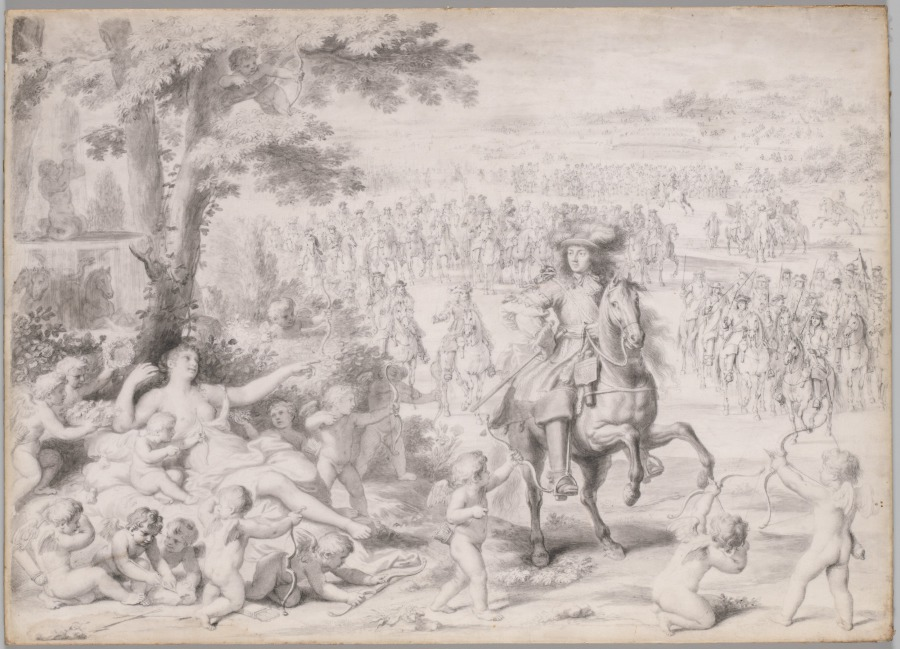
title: Louis XIV Captured by Venus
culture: France, 17th century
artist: studio of Charles Le Brun (French, 1619–1690)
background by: Adam Frans van der Meulen (Flemish, 1632–1690)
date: early 1670s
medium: black chalk, graphite, and brush and gray wash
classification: Drawing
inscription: VERSO, ON WOOD PANEL, upper left, in brown ink [on sticker]: Louis XIV / & / Duc[illegible] Montespan / by / Le Brun & / Van der Meulen ; [on same sticker] in graphite: [809?] ; center, in brown ink [on Schillersdorfer Schloss-Inventar sticker]: 47 ; upper left, in black paint: K6505 [sideways] ; upper left, in red crayon: AR 733 ; center right, in blue crayon: AR 733 ; lower center, in blue crayon: Iv. 2289